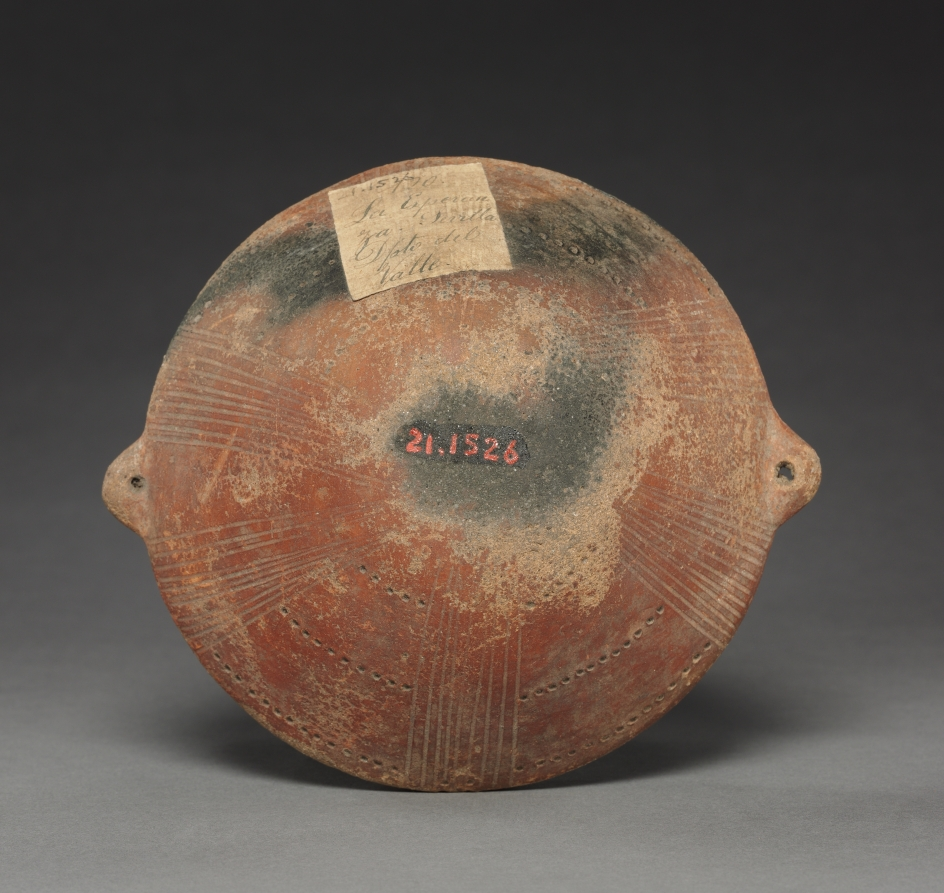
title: Jar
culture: Colombia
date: before 1550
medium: red ware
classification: Ceramic